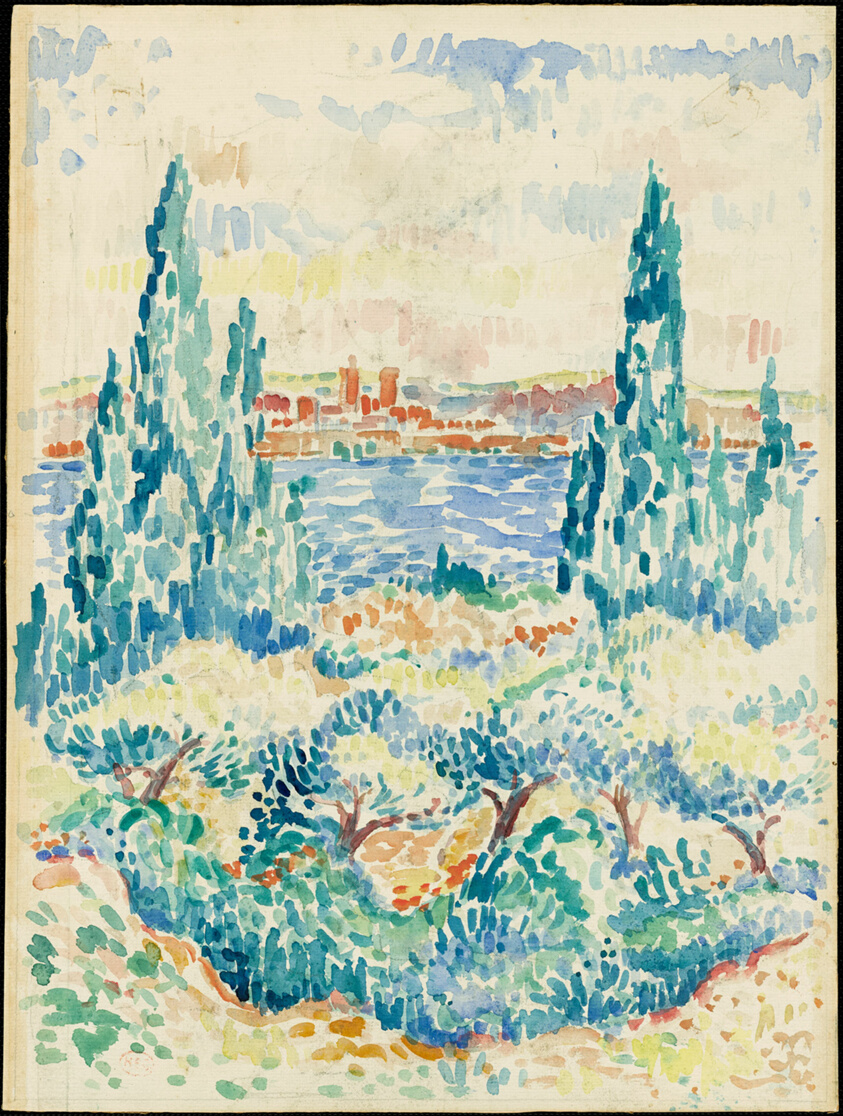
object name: Drawing and Watercolor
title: Antibes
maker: Attributed to Henri Edmond Cross; French, 1856-1910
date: 1907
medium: Watercolor, with black chalk, on ivory laid paper, laid down on tan board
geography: France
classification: prints and drawing; chalk; watercolor; drawings (visual works)